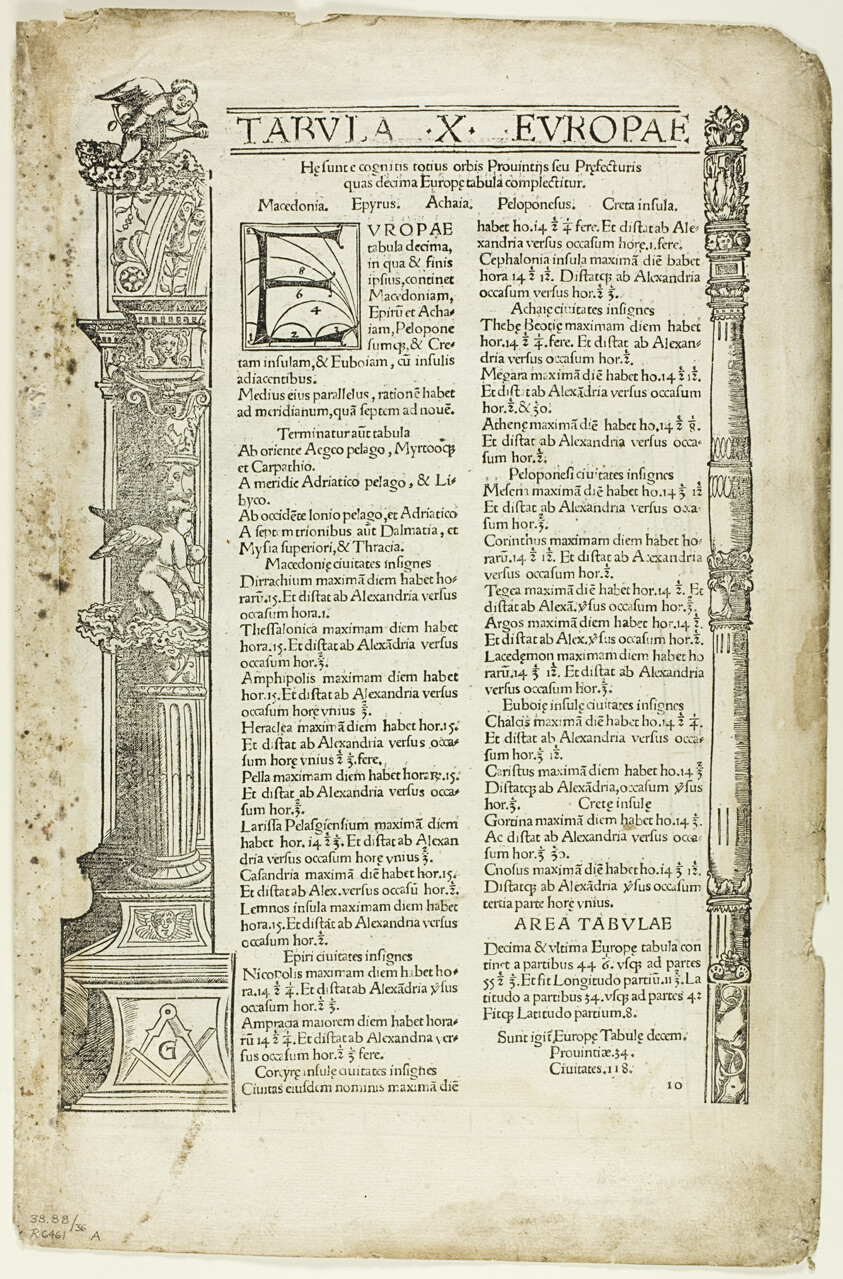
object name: Print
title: Illustration from "Geographia", plate 36 from Woodcuts from Books of the XVI Century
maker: Unknown Artist (German, 16th century); assembled by Max Geisberg (Swiss, 1875-1943)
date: 1525, assembled into portfolio 1937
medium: Woodcut on paper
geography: Germany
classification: woodcut; print; prints and drawing